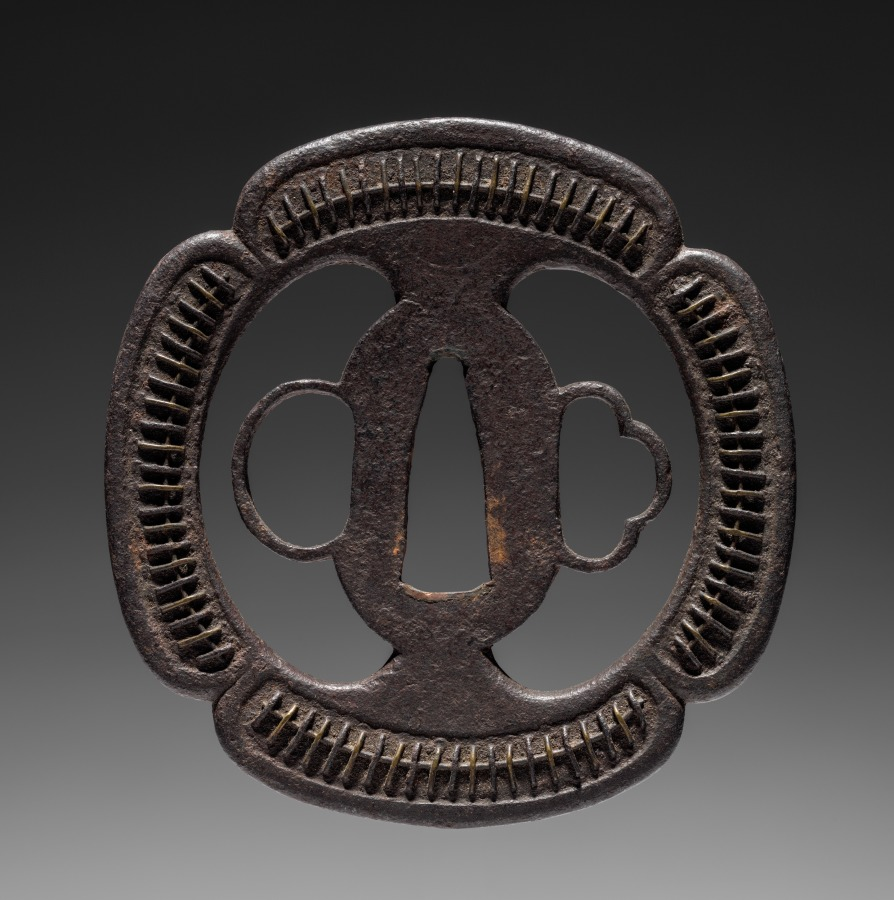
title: Sword Guard (Tsuba)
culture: Japan, possibly Edo period (1615-1868)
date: c. 1615–1868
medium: iron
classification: Arms and Armor